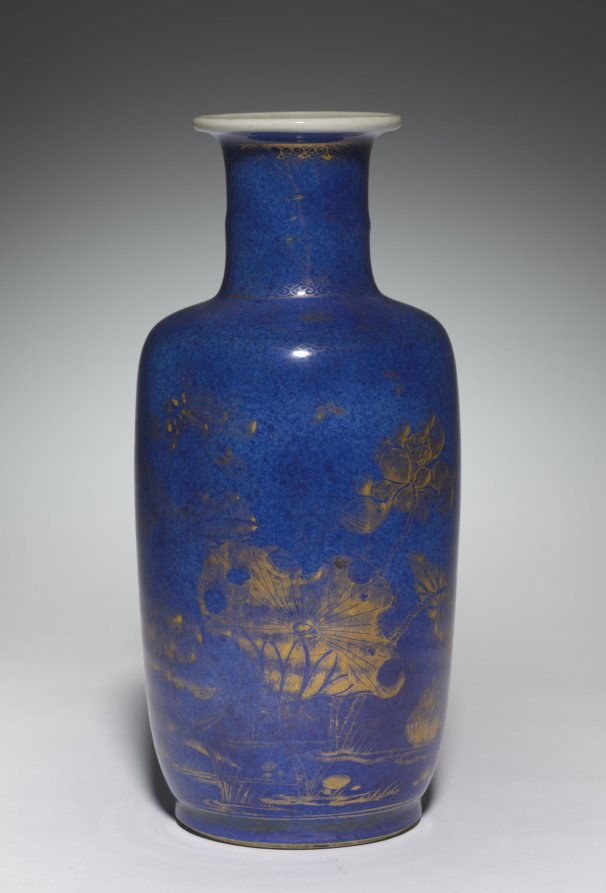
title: Vase with Lotus Plants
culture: China, Qing dynasty (1644-1911), Kangxi reign (1661-1722)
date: 1662–1722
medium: porcelain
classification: Ceramic